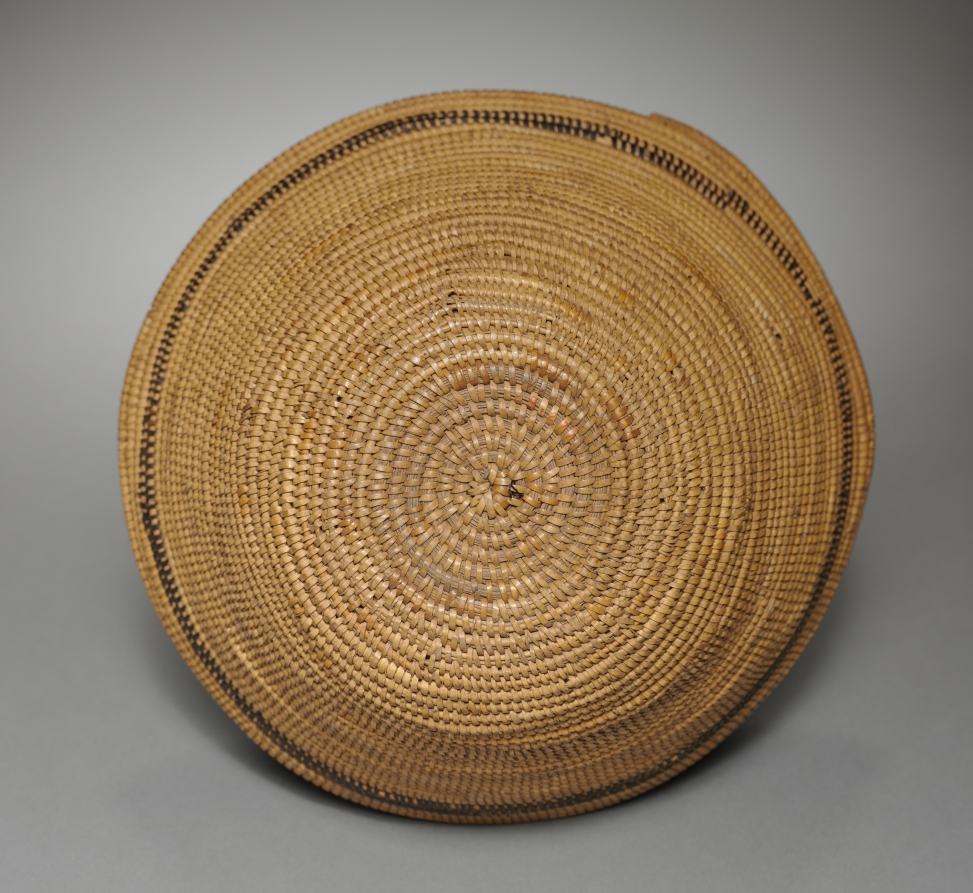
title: Hat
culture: California, Southern, Late 19th- Early 20th century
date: c 1875– 1925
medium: Juncus, Sumac; Coiled; Deergrass foundation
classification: Basketry